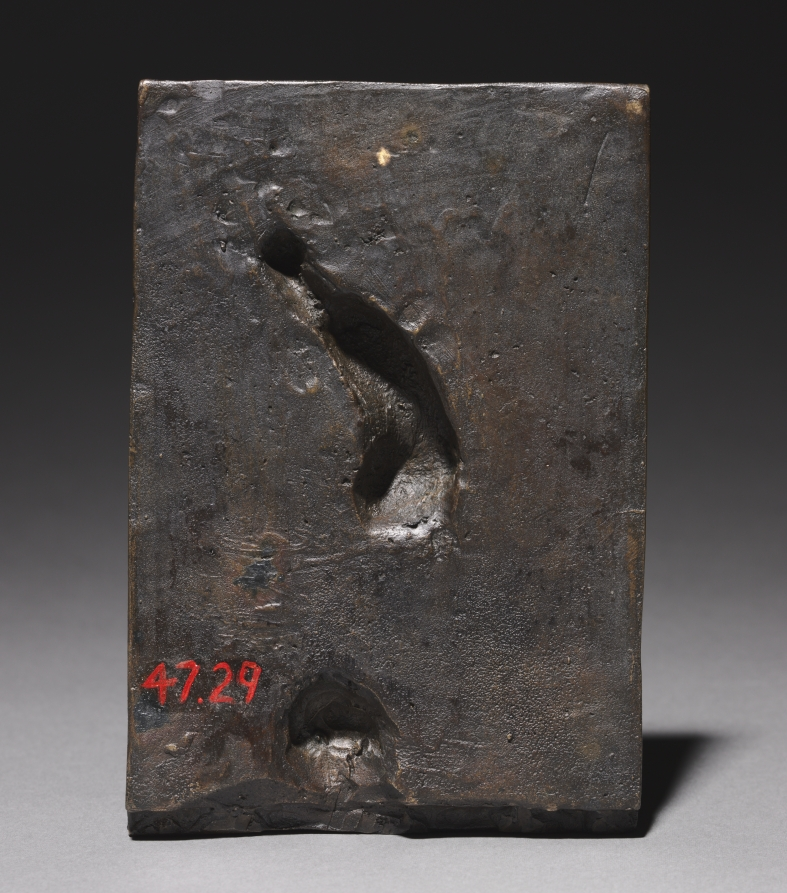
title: Satyress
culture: Italy, 16th century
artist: Giovanni Maria Mosca (Italian, 1495/99–1574)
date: c. 1525–1528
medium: bronze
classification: Sculpture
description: In antiquity, satyrs were lustful woodland deities who delighted in wine and revelry. Renaissance artists adopted them as symbols of vice and carnal love; the female satyr, or satyress, on this bronze plaquette, recently reattributed from Riccio to Mosca, was probably derived from a copper engraving of a Roman sarcophagus by Marcantonio Raimondi (c. 1470/82-1527/34). Both the sarcophagus and subsequent engraving depicted a bacchanalia, or scene of orgiastic carousal; the peculiar objects surrounding the satyress have been added by the artist, possibly in an effort to remove the figure from her lewd original composition and give a more refined meaning. The satyress rests her right hoof upon a plumed helmet. A coiled shape, possibly a snake, winds out of the helmet. To her left, a laurel tree stands with only half of its branches in bloom. Two severed animal legs are tied around its trunk and an illegible plaque hangs from one of its branches. A lyre, a pan pipe, an animal jawbone and a bow are gathered at the base of the tree. The highly allegorical nature of the work uses obscure symbols, rather than a distinct narrative, to convey meaning and could possibly be read as an allegory of physical pleasure overcoming virtue.